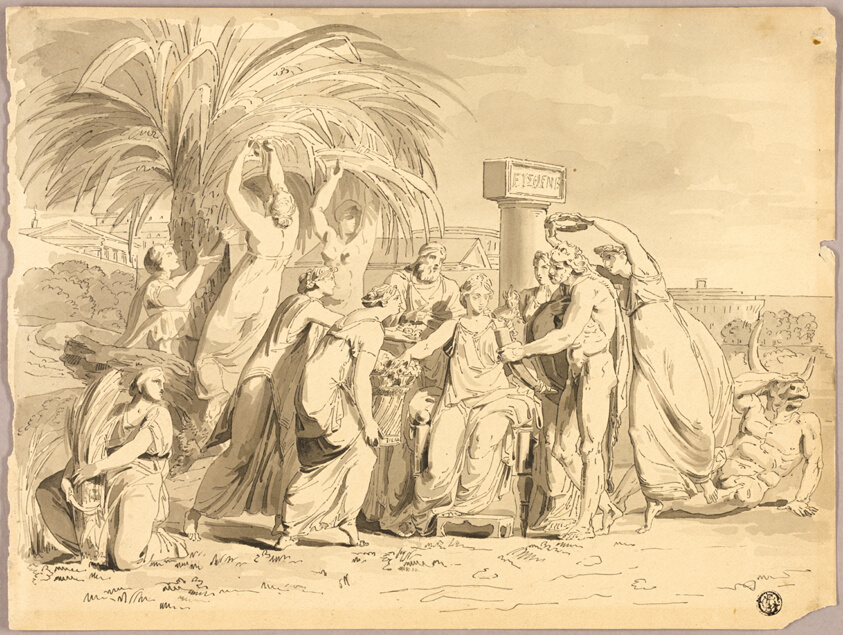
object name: Drawing and Watercolor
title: Feast of Ceres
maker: Lodovico Lipparini (Italian, 1800-1856); or after Pelagio Pelagi (Italian, 1775-1860)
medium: Pen and black ink, with brush and gray wash, on cream wove paper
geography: Italy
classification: pen and ink drawings; drawings (visual works); prints and drawing